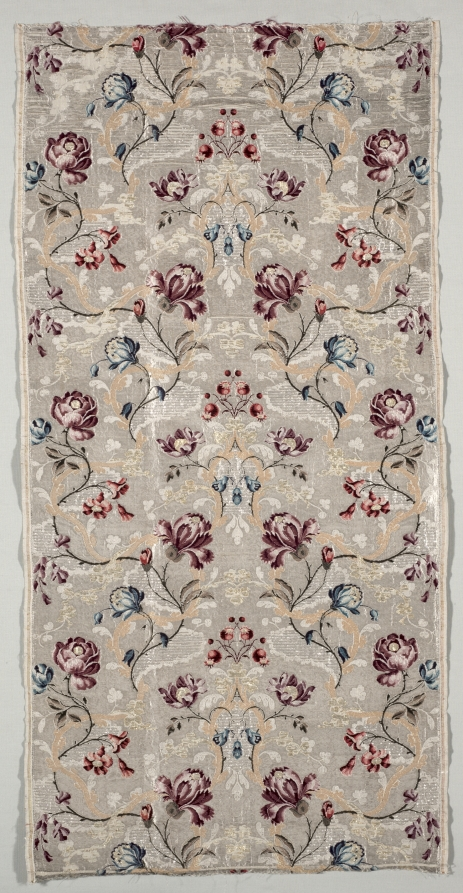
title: Length of Textile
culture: France, 18th century, Period of Louis XV (1723-1774)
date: 1723–1774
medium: brocade; silk and metal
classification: Textile